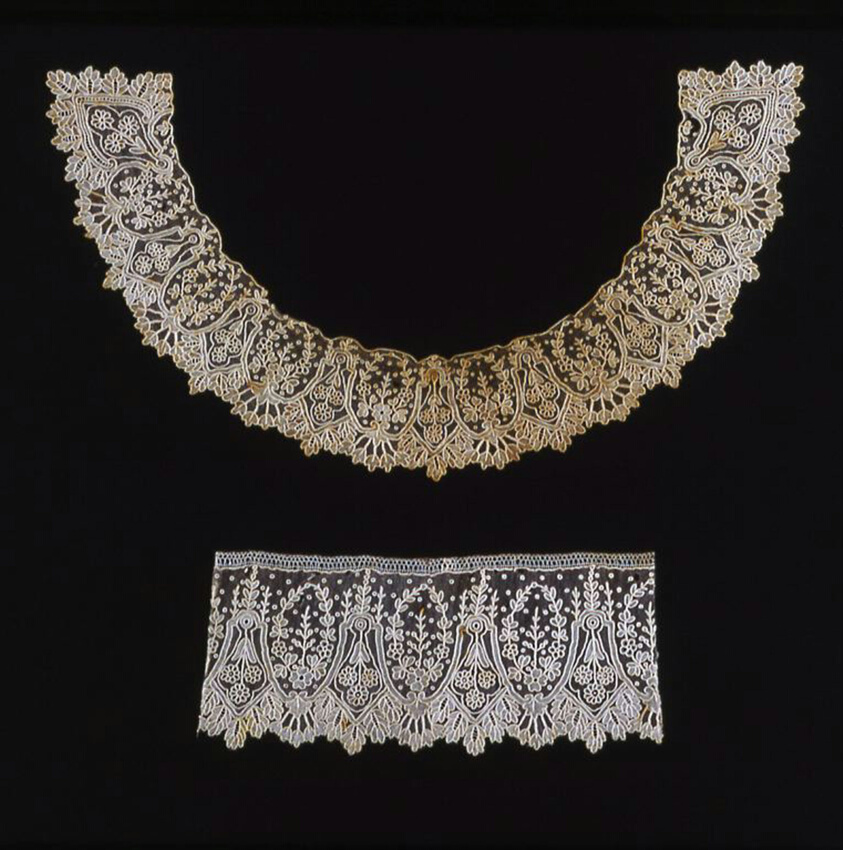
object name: Textile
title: Collar and Cuff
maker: Belgium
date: 1875/1900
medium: Cotton, needle lace of a type known as "Point de Gaze"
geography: Belgium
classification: textile; lace - needle